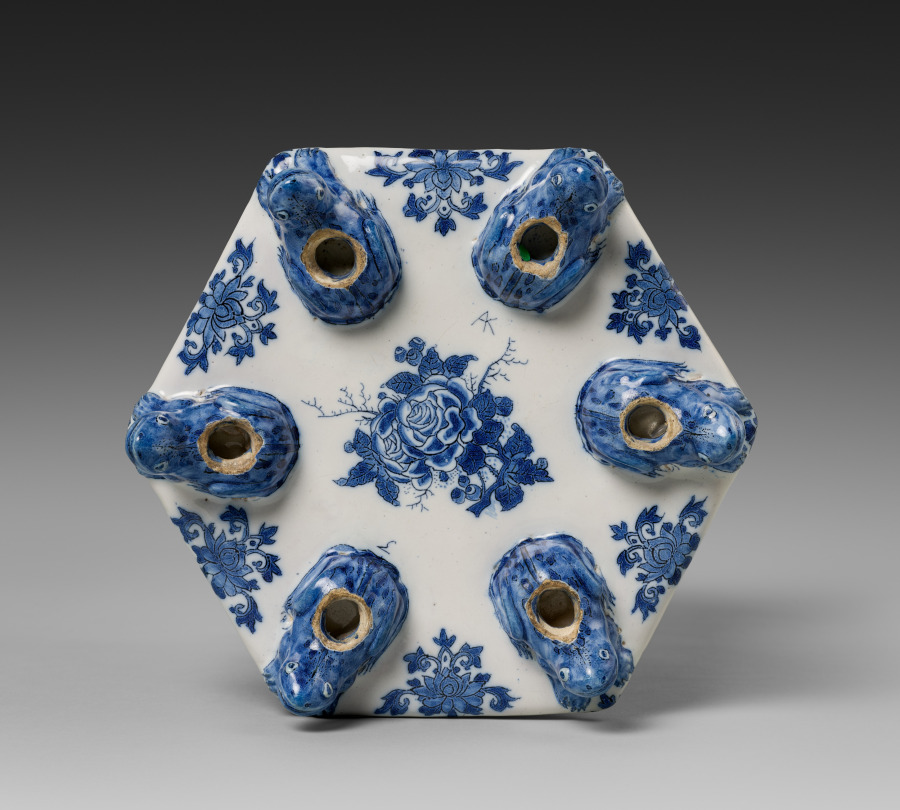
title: Base for a Flower Pyramid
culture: Netherlands, Holland, Delft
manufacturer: Adrianus Kocx (Dutch, active 1686–1701)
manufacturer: De Grieksche A (The Greek A) Factory (Netherlands, 1658–1811)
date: c. 1690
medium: Tin-glazed earthenware, painted in blue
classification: Ceramic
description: Allegorical figures representing Faith, Hope, and Love decorate the base of this pyramid, on which rest six tiers with spouts where flowers can be placed. Flower pyramids are among the most complex and luxurious types of ceramics produced in Delft in the late 1600s. This example was made in the Greek A Factory, owned by Adrianus Kocx. During his tenure, the factory became the most prestigious of Delft potteries and received commissions from Queen Mary II, who ruled over England, Scotland, and Ireland together with her husband, William III. She contributed to the international spread of the fashion for Delft ceramics.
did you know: The iconic blue-and-white ceramics from Delft originated as an attempt to copy Chinese porcelain.